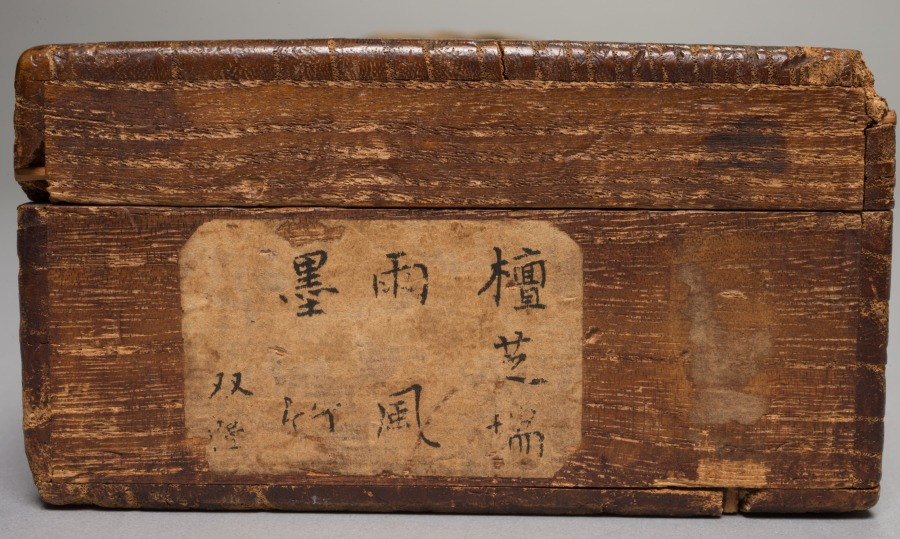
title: Bamboo in Rain; Bamboo in Wind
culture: Japan, Muromachi period (1392–1573)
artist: Genga (Japanese)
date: early 1500s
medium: hanging scroll; ink on silk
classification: Painting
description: East Asian paintings from China, Korea, and Japan were frequently conceived as sets of multiple images. These sets might have been composed for specific palace or temple rooms, or to portray a specific theme, such as the four seasons. Over time, the original intent of such sets is often lost through damage, changes in ownership, or a variety of other reasons. The identity of the artist can also be lost, but then, sometimes, retrieved. This pair of ink paintings has traditionally been labeled as Japanese and attributed to the 16th-century painter Genga. Since there are no seals or signature of the artist on the painting, this attribution was based on comparisons of brush style with paintings known to be by Genga. More recent study indicates that while the 16th century is an appropriate time frame for the pair, the precise cultural identity of the artist is not certain after all. The dark, eccentric shapes of the rocks and bamboo clusters and the dramatic tonal contrasts evident throughout the composition point to either Korean authorship or influence upon a Japanese painter of the period.